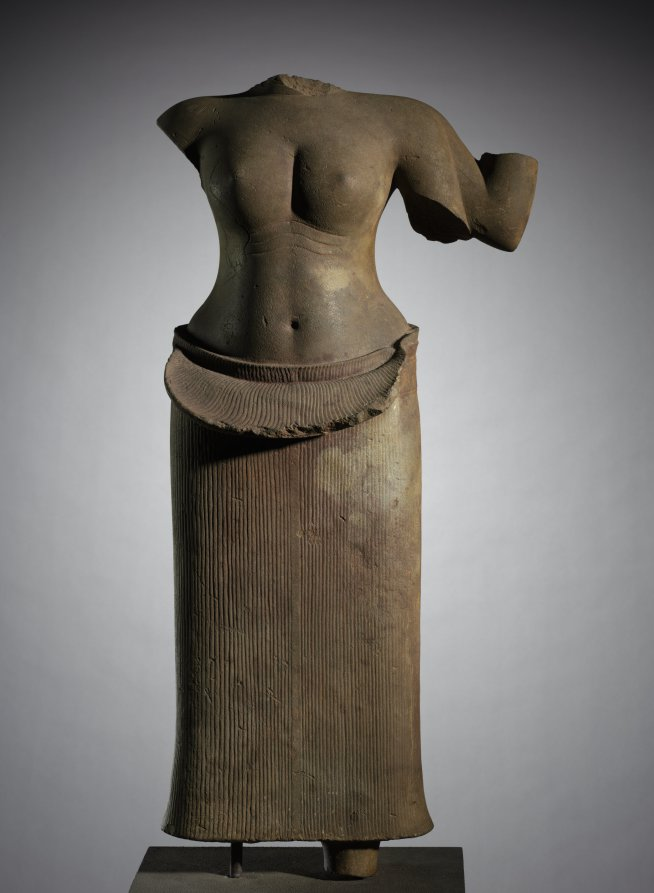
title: Standing Female Deity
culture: Cambodia, Angkor, Bakheng, 10th century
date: 900s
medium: stone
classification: Sculpture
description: This four-armed deity wears a sarong skirt, with its pleated end folded over the belt, as was the fashionable Bakheng style during this period. The incised lines beneath the breasts indicated folds of flesh as marks of beauty. This figure relates to the sculptures of the Phnom Bakheng, a temple dedicated to Shiva.